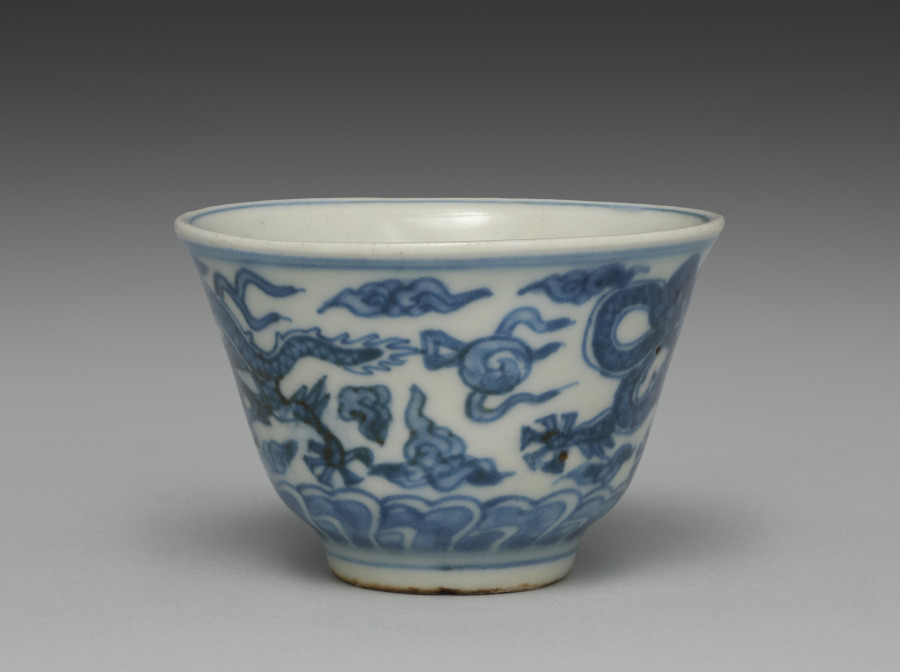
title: Cup from Tea Cups with Dragons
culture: Japan, Edo period (1615–1868)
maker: Seifū Yohei I (Japanese, 1801–1861)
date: 1840s–57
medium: One from a set of five tea cups; porcelain with underglaze blue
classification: Ceramic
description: Seifū Yohei I made both blue and white porcelains after Ming dynasty (1368–1644) Chinese wares fired in the kilns at Jingdezhen for export. He also made colorful stoneware in the style of his teacher, Nin’ami Dōhachi (Takahashi Dōhachi II) (1783–1855).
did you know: A small figure of an elephant serves as the handle for the lid.